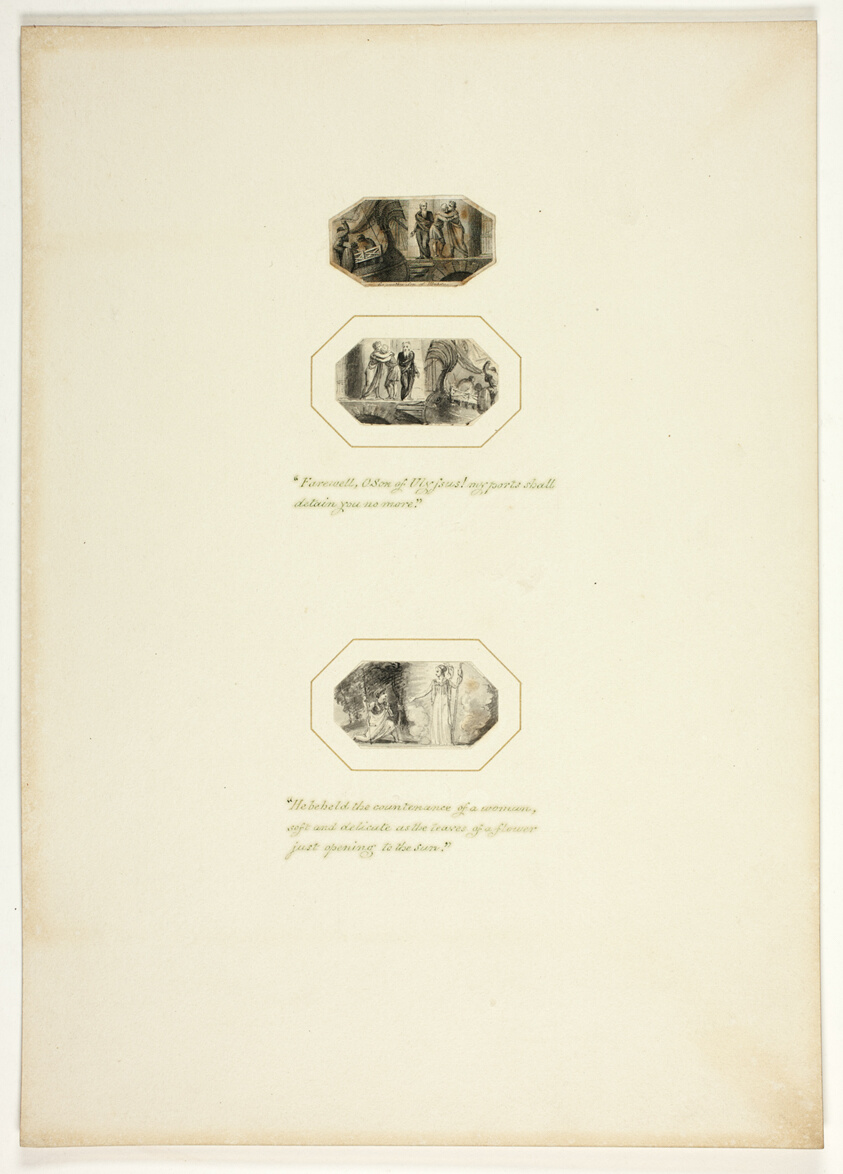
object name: Drawing and Watercolor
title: Study for a plate from Telemachus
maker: Thomas Stothard (English, 1755-1834)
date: c. 1797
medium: Ink wash on paper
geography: England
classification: ink and wash; prints and drawing; paper; drawings (visual works)